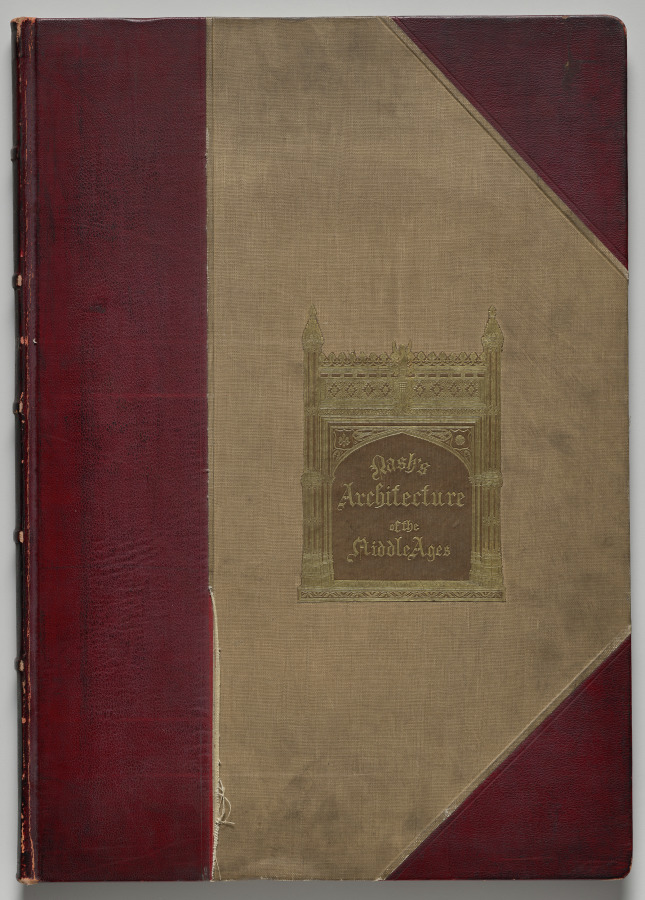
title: Architecture of the Middle Ages: Title Page - In Croyden Church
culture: England, 19th century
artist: Joseph Nash (British, 1808–1878)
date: 1838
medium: lithograph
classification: Print